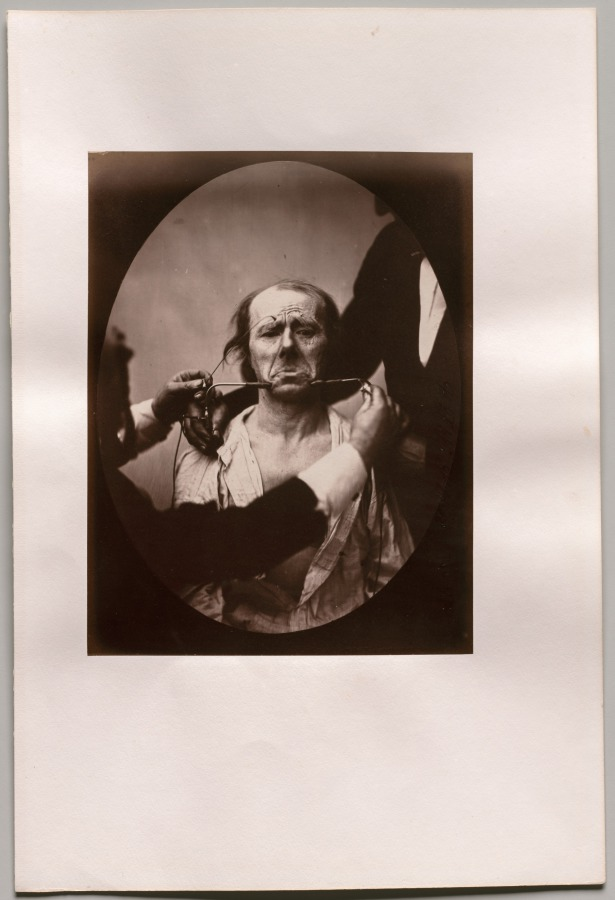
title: Figure 45: Contraction électrique forte des triangulaires des lèvres et des sourciliers: douleur et déspoir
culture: France, 19th century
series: Mécanisme de la physionomie humaine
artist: Guillaume-Benjamin-Amand Duchenne (de Boulogne) (French, 1806–1875)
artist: Adrien Tournachon (French, 1825–1903)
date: c. 1856, printed 1862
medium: Albumen print from glass plate negative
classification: Photograph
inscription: On the verso, lower left corner, in graphite, “fig. 7”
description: Duchenne embarked on the first scientific, systematic exploration of the physiology of human facial expression and hoped, through photographs of his experiments, to teach artists how to portray those emotions. The experiments were performed by applying electrical stimulation to a single muscle on one side of the face, so that the viewer could clearly see the impact of the muscular contraction.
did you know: Duchenne, a neurologist at a hospital for the poor in Paris, turned to photography to record the grammar of human expression.